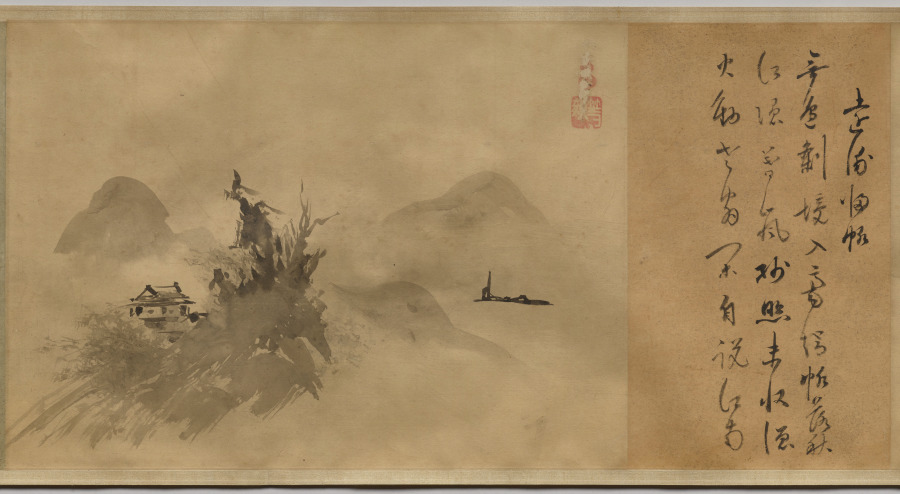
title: Poems and Pictures of the Eight Views of Xiao-Xiang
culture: Japan, Momoyama period (1573–1615)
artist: Unkoku Tōgan (Japanese, 1547–1618)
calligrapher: Inkei Gentetsu (Japanese, 1562–1612)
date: 1605–12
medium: Handscroll; ink on paper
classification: Painting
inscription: Each painting sealed with red gourd-shaped seal reading Unkoku (雲谷) and a square seal reading Tōgan (等顔).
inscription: Each painting prefaced with a titled poem on the Eight Views of Xiao-Xiang by Yujian Ruofen (active late 13th century) inscribed by Japanese Buddhist monk Inkei Gentetsu (1562–1612).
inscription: 右寫玉㵎之筆勢／雪舟末葉等顔筆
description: Unkoku Tōgan brushed these scenes using the splashed-ink technique associated in Japan with the Chinese monk Yujian Ruofen (active late 1200s). Xiao-Xiang refers to the region in present-day Hunan province, where the Xiang River and its tributaries converge. Each of the eight views evokes a time of day or season. The earliest surviving series of Xiao-Xiang paintings is by Wang Hong (active mid-1100s), but textual evidence tells us the theme appears earlier. It was later adopted in Japan and Korea, as seen here. The poems were inscribed by Inkei Gentetsu, the third abbot of the Rinzai Zen temple Tōshunji, Japan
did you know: The “Tō” of Tōgan comes from the name of painter Sesshū Tōyō (1420–1506).